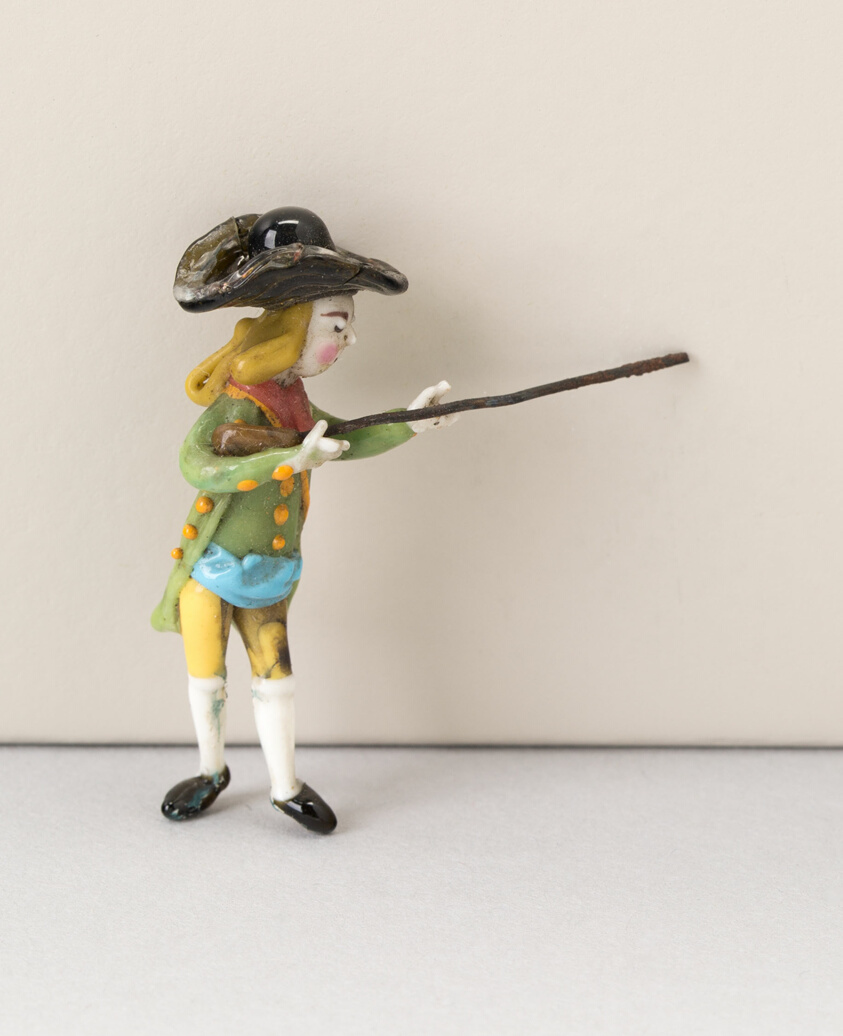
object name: Glass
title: Hunter with Gun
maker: Nevers, France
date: 18th century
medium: Glass; lampwork (verre de Nevers), metal armature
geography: France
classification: decorative object/ornament; lampwork; glass; european decorative arts